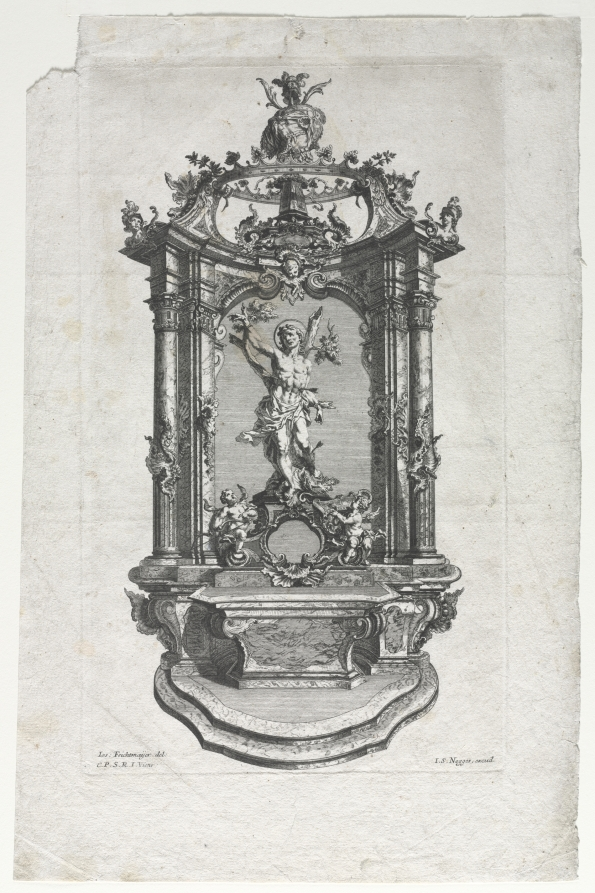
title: Model for Altar for Woodcarvers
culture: Germany, 18th century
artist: Gottfried Bernhard Götz (German, 1708–1774)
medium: engraving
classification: Print